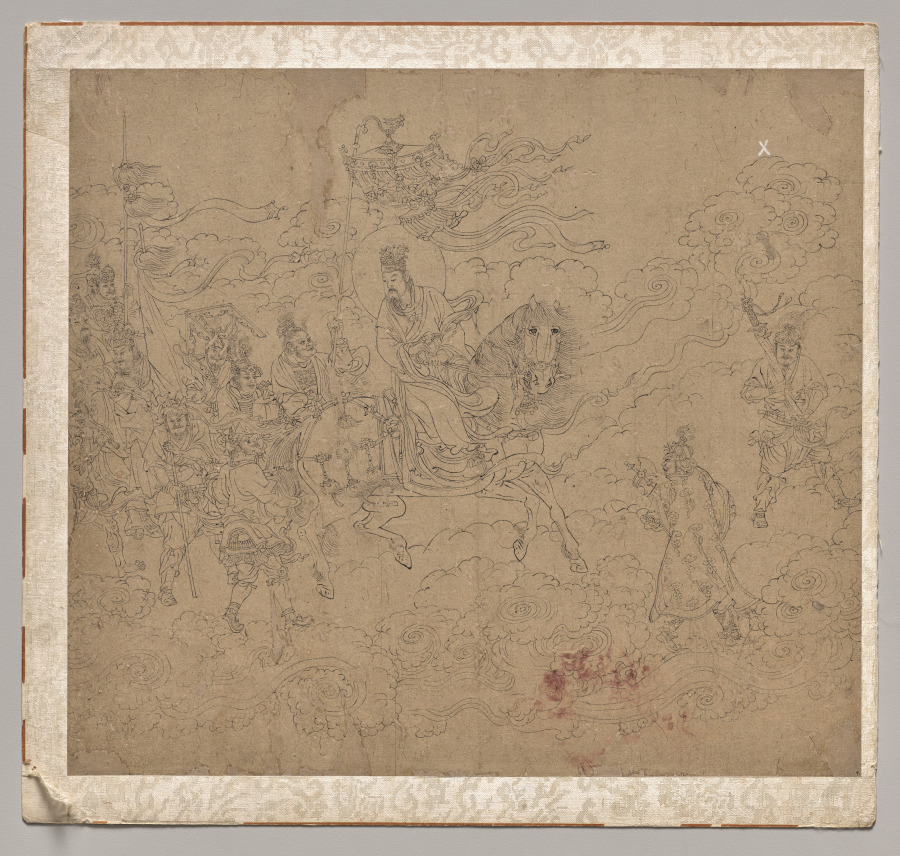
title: Album of Daoist and Buddhist Themes: Procession of Daoist Deities: Leaf 4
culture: China, Southern Song dynasty (1127-1279)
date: 1200s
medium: album, ink on paper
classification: Painting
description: Leaf 4 depicts one of the sanguan 三官大帝 (Three Officials of Heaven, Earth, and Water) in the Daoist pantheon. These "officials" work as intermediaries between human beings and the bureaucracy of the netherworld. This deity, riding on a lively steed, most likely represents the "Official of Earth" 地官. Leading the way, his entourage includes a host of protective guards who carry his sword and chair, hoist his parasol and flags, or simply hold their own weapons. These figures all walk on clouds, moving along with a strong wind that causes the parasol and flags to flutter, creating a sense of overall motion.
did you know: A demonic figure on the far left of the entourage is carrying a hunting dog on his shoulder.